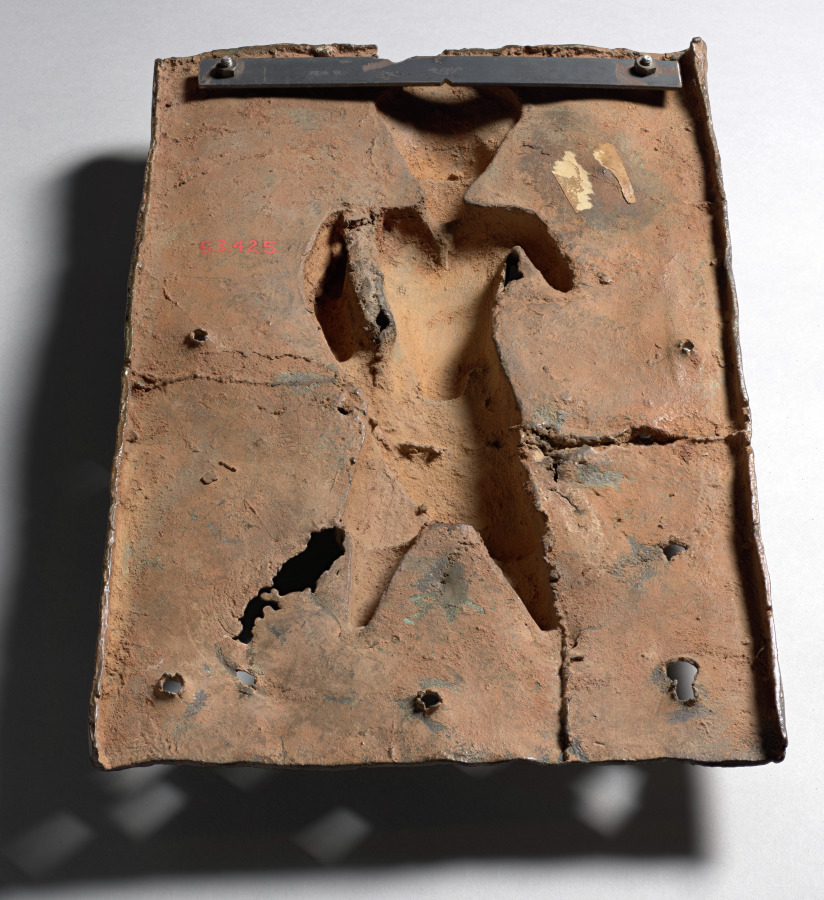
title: Plaque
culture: Nigeria, Benin Kingdom, Ẹdo peoples, members of the Igun Eronmwon (royal brasscasters) guild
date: 1500s–1600s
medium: Copper alloy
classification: Sculpture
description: Craftsmen modeled brass plaques like this in wax before casting them with hot metal. Molds pushed out figures’ general shapes, then details—such as this warrior’s staff and court sword (ẹbẹn)—were added by hand. Reflecting Benin’s global connections, the incised flowers may have Islamic or European origins. Called ebe-amẹn (river leaves) they are identified with Olókun, god of the waters. The interlaced side motifs may connect several early plaques also linked by topic and style. The palace plaques were in storage before the 1897 Siege of Benin. Recently, an art historian virtually reconstructed their former display in the palace based on their dimensions and imagery.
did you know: The bent sides of this plaque once helped attach it to wooden beams in a palace.